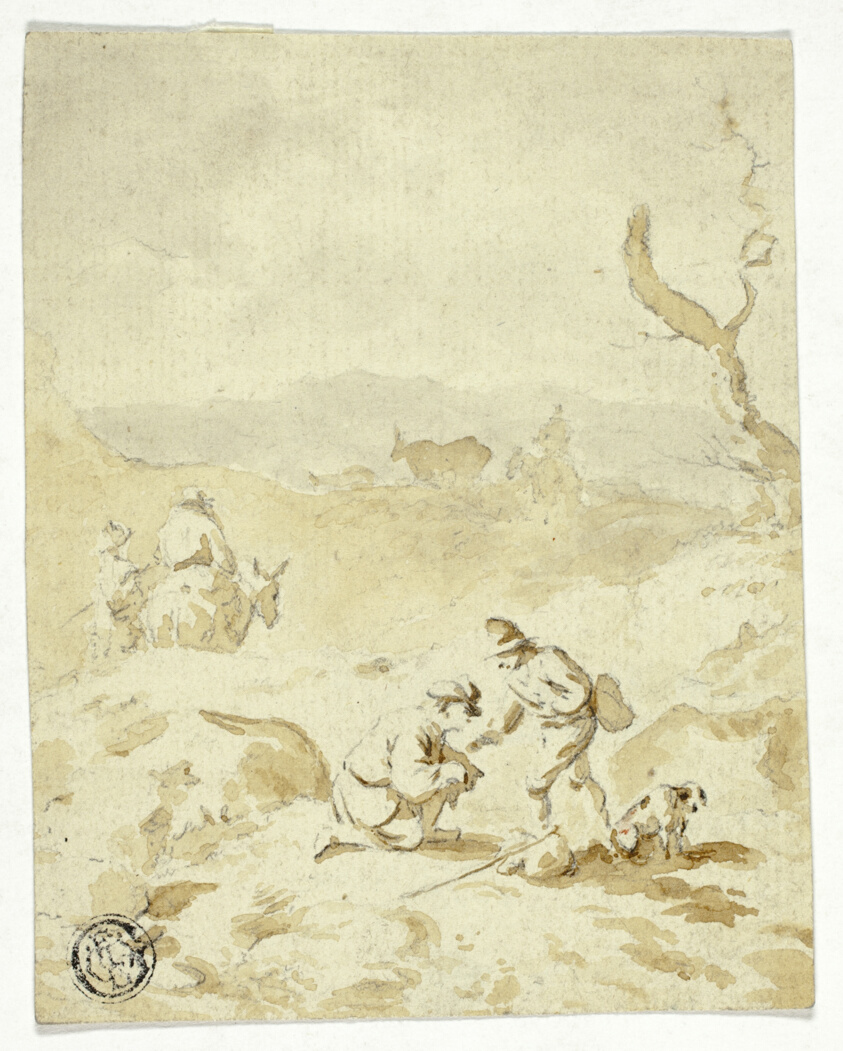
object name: Drawing and Watercolor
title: Men Traveling Through Hills with Mules, Packs and Dog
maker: Circle of Herman Saftleven III (German, 1609-1685); or Claes Piertersz. Bercham (Dutch, 1620-1683); or Cornelis Saftleven (Dutch, 1607-1681)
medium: Graphite, with brush and gray and brown wash over graphite, on ivory laid paper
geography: Germany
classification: drawings (visual works); graphite; prints and drawing